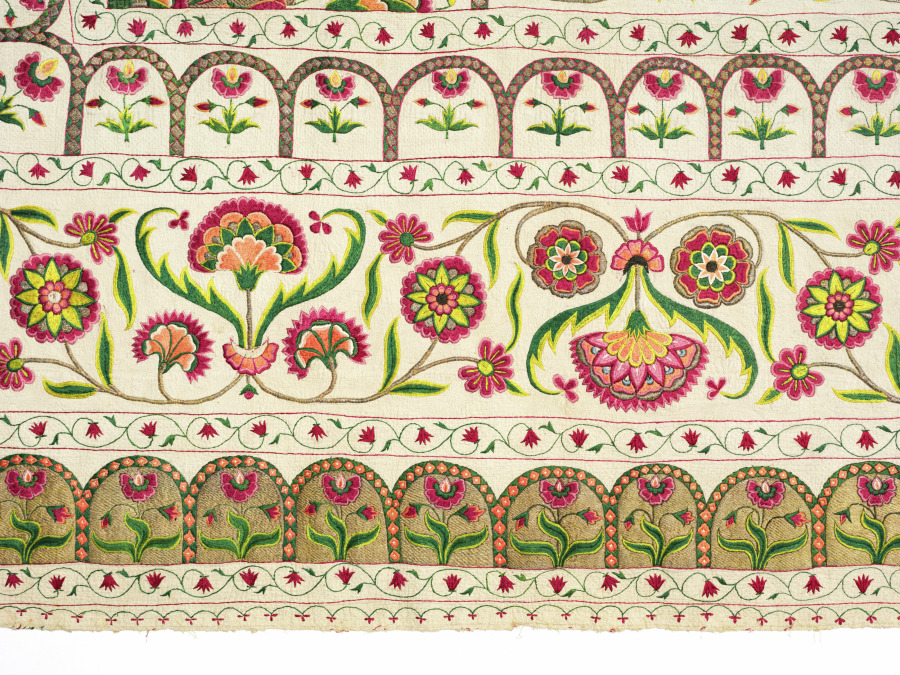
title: Spread with floral medallion pattern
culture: Mughal India, Deccan, probably Goa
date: 1700s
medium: Cotton: plain weave, quilted; silk and gilt-metal thread: embroidery, couched laid work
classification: Embroidery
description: This textile could have been used as a covering for seating on the floor or as a bedspread in either an Indian or European setting. In any case, it was not meant to be walked on. Its material and imagery testify to flourishing international relationships. The arabesque designs, consisting of swirling vines with large and small flowers, recall a radiant paradise and have roots in Persian, Chinese, and Mediterranean sources. The use of gold-wrapped thread had been widespread in Spain and Portugal before it was adopted in India, probably first in Goa, a Portuguese colony on the southwestern coast of India from 1510 to 1961. The vibrant colors are distinctive to this region of India.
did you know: A small blue and yellow bird perches at the center of the otherwise solely floral design.